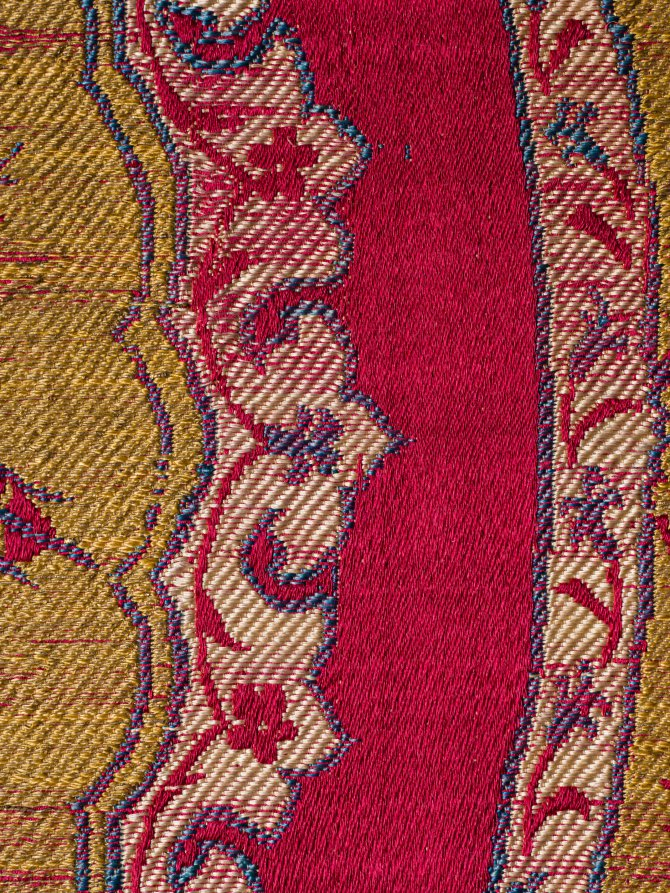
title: Lampas with floral medallions in ogival lattice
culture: Turkey, Istanbul or Bursa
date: 1550–75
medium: Silk and gilt-metal thread; lampas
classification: Textile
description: This signature Turkish brocaded silk has a classic elegance associated with the artistic height of the 1500s. The prominent golden medallions and ogival (curved) lattice contrast with exceptionally delicate Turkish flowers—tulips, roses, carnations, and hyacinths—which all grow on a single vine. The symmetrical design and two complete medallions with lattices across the width are typical Turkish features of fine brocaded silks. Its original function is uncertain. Possibly it was intended for an imperial kaftan, a garment consisting of a long gown with sleeves reaching below the hands, examples of which are preserved in the Topkapi Palace in Istanbul, the imperial center of the vast and wealthy Ottoman Empire.